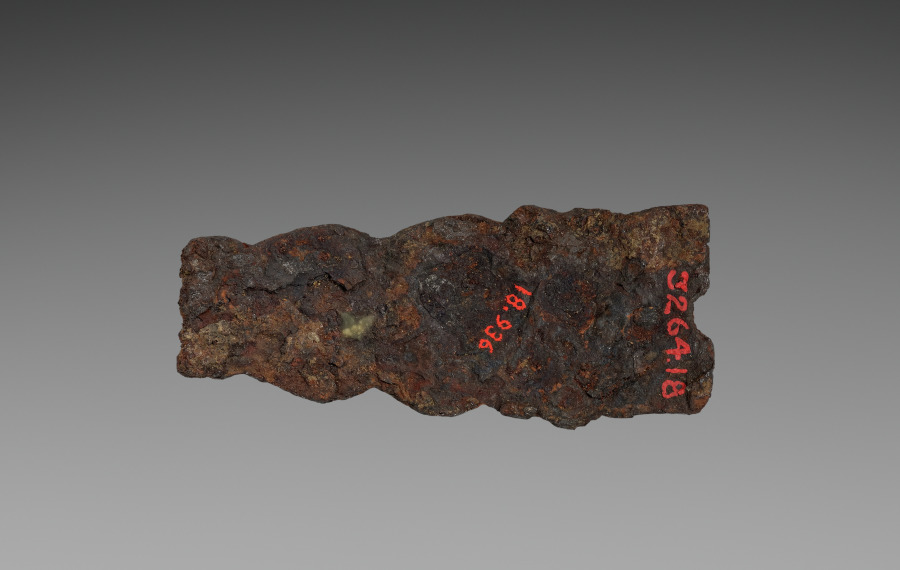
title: Buckle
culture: Merovingian, Burgundian, Migration period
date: 600s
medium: iron with silver overlay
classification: Jewelry